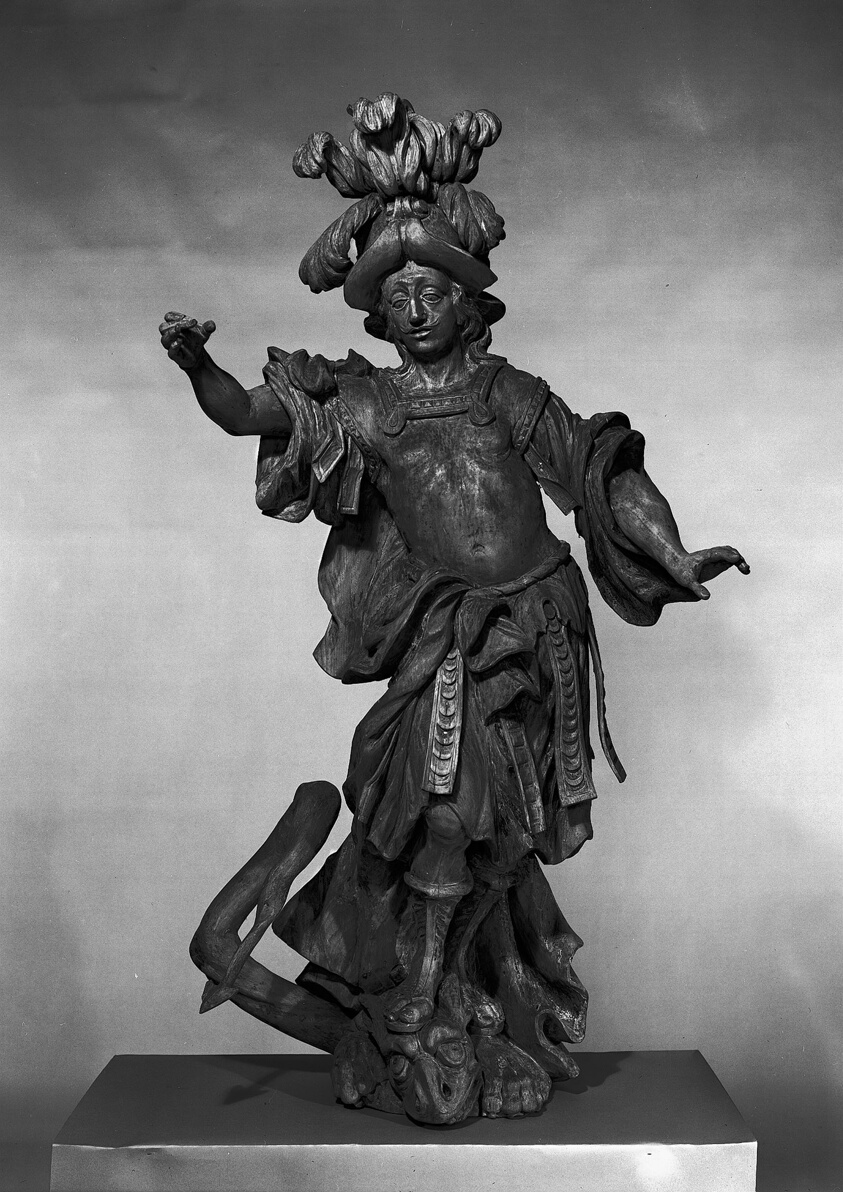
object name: Sculpture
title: Saint George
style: 18th Century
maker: Anton Eberhardt (Austrian, active 1760)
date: c. 1760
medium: Lindenwood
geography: Austria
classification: large scale; sculpture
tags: saints, religious figures, religious, religion, man, helmets, feathers, dragon, Devotion, Christianity, Christian subjects, armor